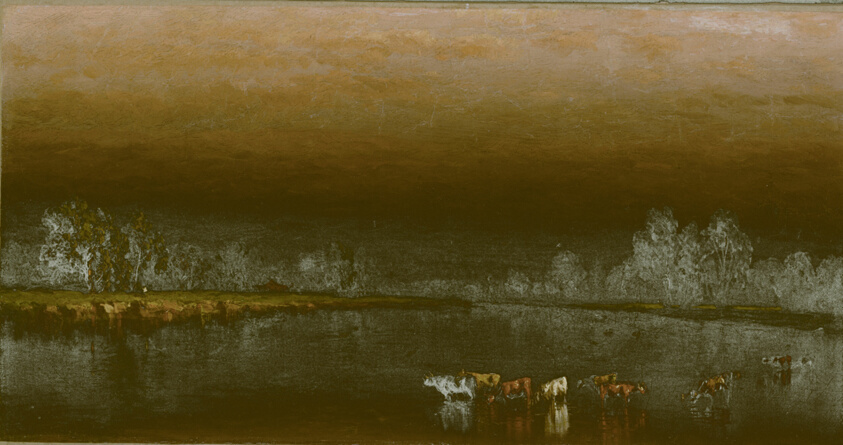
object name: Painting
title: Cows in a Pond at Sunset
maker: Sanford Robinson Gifford (American, 1823–1880)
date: 1860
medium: Oil on canvas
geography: New York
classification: painting; american arts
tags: landscapes